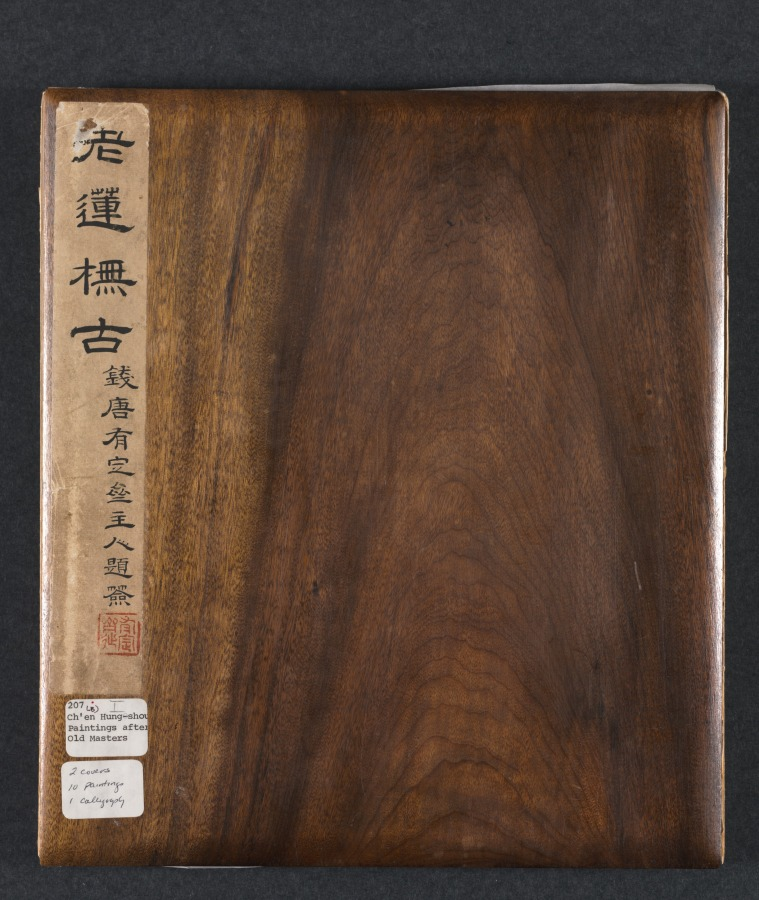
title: Paintings after Ancient Masters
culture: China, Ming dynasty (1368–1644)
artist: Chen Hongshou (Chinese, 1598/99–1652)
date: 1598–1652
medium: Double album with twenty-two leaves; ink or ink and color on silk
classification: Painting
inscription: Artist's titles, signatures, and 21 seals: A. Scholars in a Garden. Hung-shou painted for old Chung. [seal] Chang-hou. B. Lao-tzu Riding an Ox. Hung-shou respectfully painted. [seal] Ch'en yin Hung-shou. C. Narcissus and Bare Trees. The Taoist Chung-ch'ing entrusted Lao-lien to paint [this]. [seal] Chang-hou. D. Autumn Landscape. Lao-lien painted this for Lao-ts'ang. [seal] Chang-hou. E. Portrait of T'ao Yuan-ming. Lao-lien [seal] Hung-shou. F. Lotus and Rocks. Hung-shou painted after the style of Ts'ui Po and presented it to the Buddhist disciple Lin Chung-ch'ing. [seal] Chang-hou. G. Taoist and Crane in Autumn Landscape. The old man Fu-ch'ih painted for the Taoist Chung-ch'ing. [seal] Chang-hou. H. Portrait of Chung-ch'ing in a Landscape. Lao-lien painted for Chung-ch'ing. [2 seals] Chang-hou; Ch'en yin Hung-shou. I. Chrysanthemum and Rock. Hung-shou [seal] Hung-shou. J. Landscape in the Style of Ni Tsan. Lao-lien [seal] Chang-hou. L. Mr. Five Willows (Wu-liu), T'ao Yung-ming. Mr. Five Willows Chung-ch'ing entrusted Hung-shou to paint [this]. [seal] Chang-hou. M. A Lohan [after Kuan-hsui]. Buddhist disciple Ch'en Hung-shou respectfully painted. [2 seals] Chun-t'i ti-tzu; Chang-hou. N. A Bird and Peach-Blossom Branch. Hui-lun-shang painted after Tao-chun [Emperor Hui-tsung] and presented it to Ts'ang-fu chu-chih. [seal] Ch'en yin Hung-shou. O. Travellers in an Autumn Landscape. Hung-shou [seal] Chang-hou. P. A Lady. Hung-shou [seal] Hung-shou. Q. Crysanthemum. Hung-shou painted in imitation of the Northern Sung style for Taoist friend, Ts'ang-fu. [seal] Chang-hou. R. Scholar Reading in a Thatched Hut by a Waterfall. Chung-ch'ing entrusted Hung-shou to paint. [seal] Chang-hou. S. Scholar with Staff and Brush. Hung-shou [seal] Chang-hou. T. An Ancient Tree. Hung-shou [seal] Chang-hou. U. Rock, Old Tree, and Bamboo. Hung-shou [seal] Hung-shou.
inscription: 2 colophons (leaves K and V) and 34 additional seals: 24 seals of Lin Chung-ch'ing (Lin Ts'ang-fu or Lin T'ing-tung, friend of Chen Hongshou, for whom the album was painted); 2 colophons, dated 1893 and 1899, and 5 seals of Weng Tonghe 翁同龢 (1830-1904); 2 seals of Weng Tongjue 翁同爵 (older brother of Weng Tonghe; 1814-1877); 2 seals of Weng Wan-go 翁萬戈 (1918-2020); 1 unidentified.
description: The twenty paintings in this double album by Chen Hongshou include landscapes, figures, and flowers. It also has one leaf featuring a woman, an often-used subject not found in the other albums from the latter part of his career. His late works are wonderful summations of Chen's peculiar and quirky art—archaistic, hyper-refined—but without accompanying shallowness or sentimentality. His figures and landscapes in the late albums are miniaturized, not unlike the small Chinese gardens, or the carefully selected small table rocks or old roots used for contemplation to see the world in miniature. This loss of scale is quite deliberate and reflects the psychological situation of a depressed class like the Ming loyalist officials and scholars, deprived of their integrity and honor, and forced to lead a diminished and restricted existence.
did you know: Chen Hongshou made this double album with twenty paintings for a friend, Lin Zhongqing.